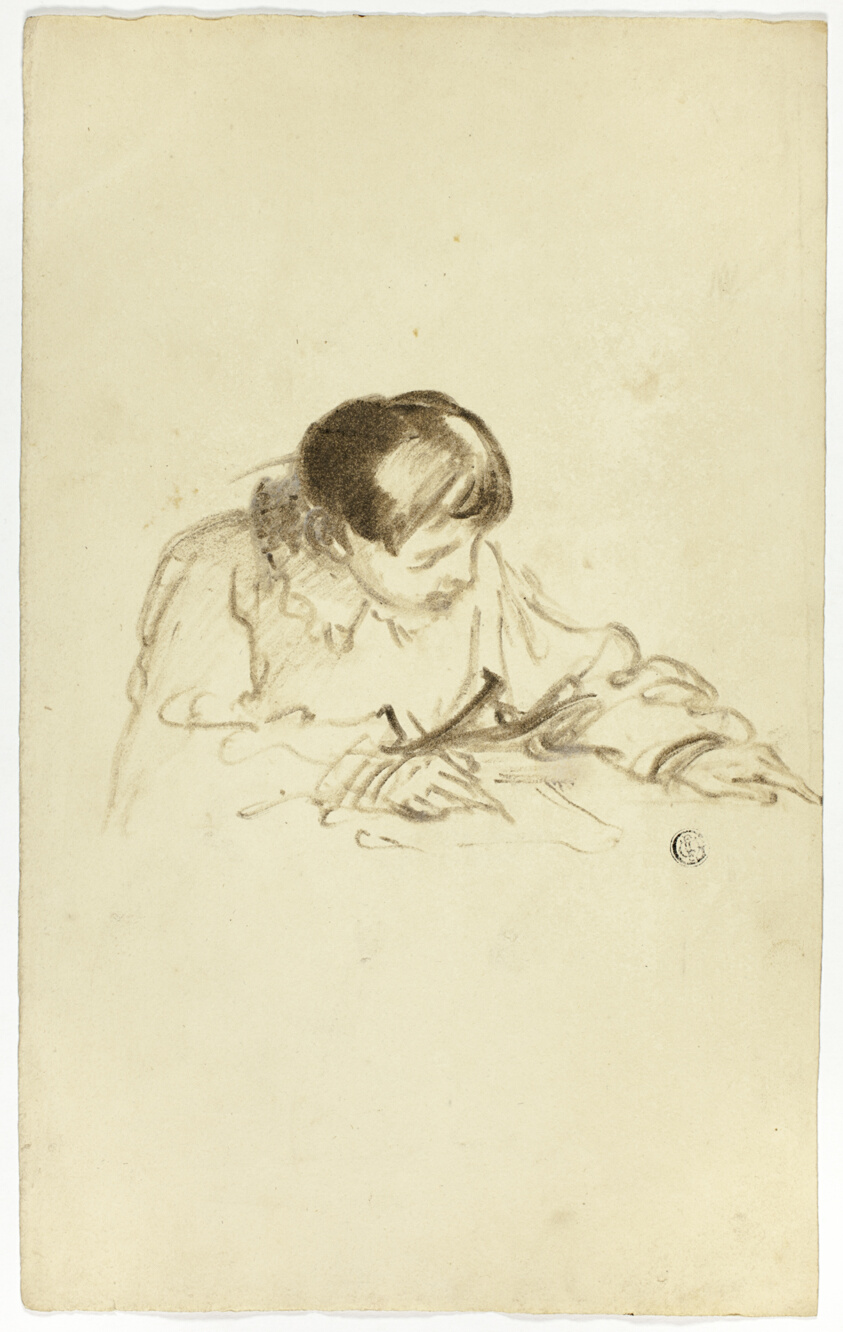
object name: Drawing and Watercolor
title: Boy Writing or Sketching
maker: Thomas Jones Barker (English, 1815-1882); or Thomas Barker (English, 1769-1847)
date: c. 1830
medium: Bistre crayon on cream wove paper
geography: England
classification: drawings (visual works); paper; crayon; prints and drawing